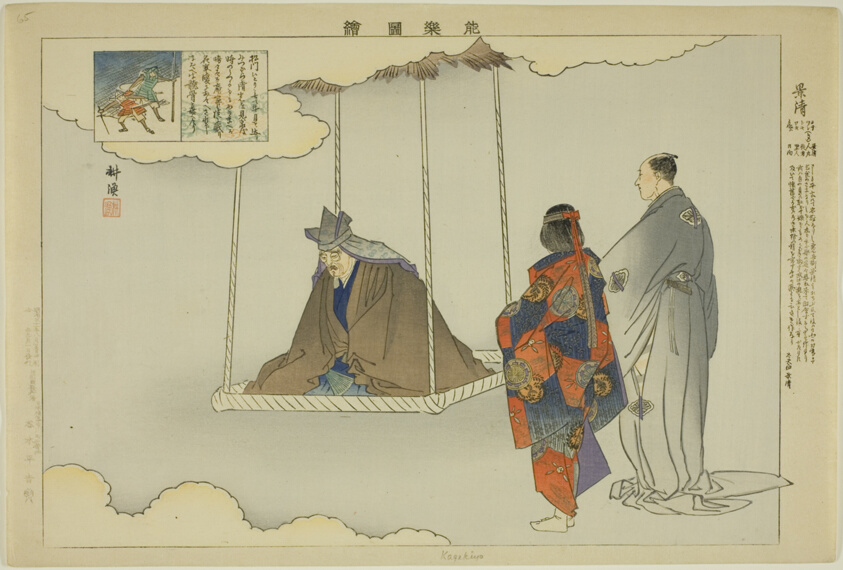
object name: Print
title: Kagekiyo, from the series "Pictures of No Performances (Nogaku Zue)"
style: Japanese (culture or style)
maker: Tsukioka Kogyo; Japanese, 1869-1927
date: 1898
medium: Color woodblock print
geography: Japan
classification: woodblock print; print; asian art